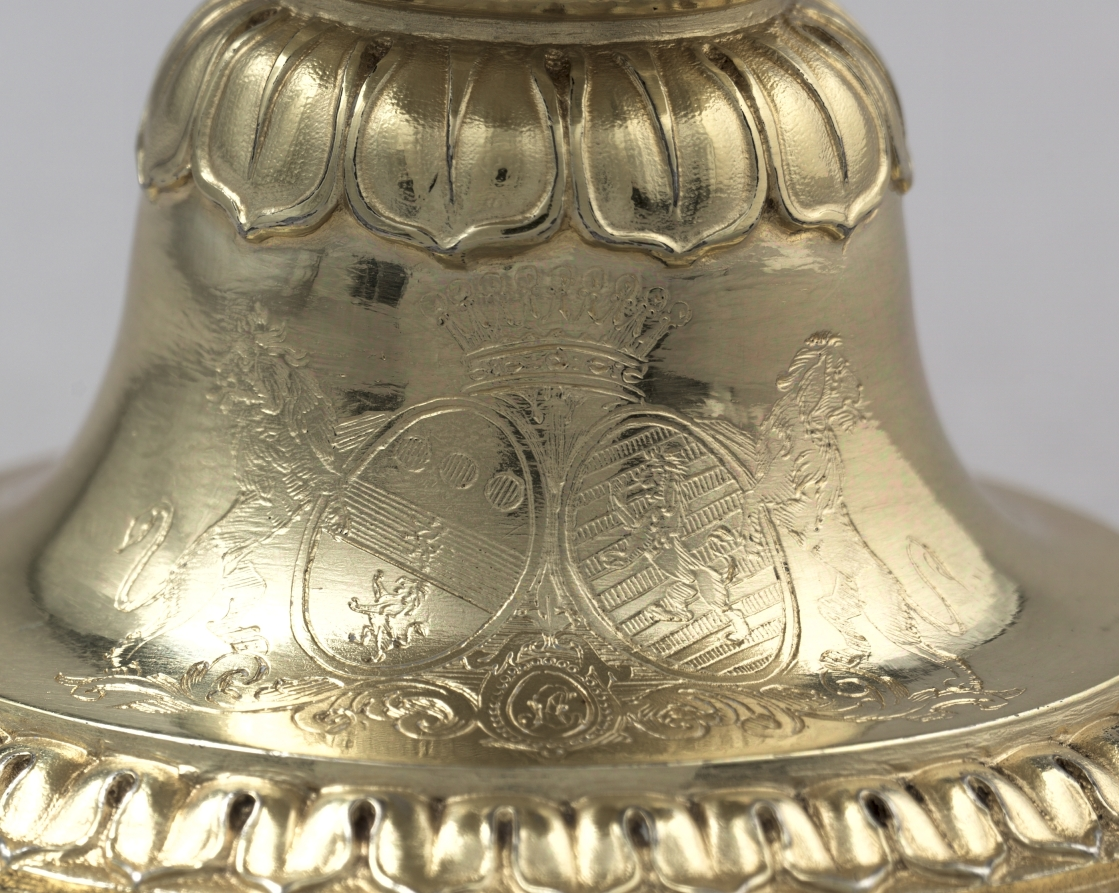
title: Ewer (aiguière)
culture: France, 19th century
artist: Jean Baptiste Claude Odiot (French)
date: c. 1817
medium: silver gilt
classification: Silver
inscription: [Excise mark for medium-sized work, Paris, 1809-1819, on edge of base]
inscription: [Two maker's marks of Jean-Baptiste-Claude Odiot after the Revolution, inside foot]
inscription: [Official assay mark for first standard silver, Paris, 1809-1819, near exterior upper rim]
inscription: [Applied coat of arms of the count Alfred de la Chapelle, Seigneur of Morton and Beaulieu, Périgord “accolé” with an alternate version of de la Chapelle, exterior of foot]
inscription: [Struck twice, interior foot]: "ODIOT"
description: Jean-Baptiste-Claude Odiot’s reputation stretched internationally. Commissioned by Russian count Nikolei Demidoff, this ewer was one part of an extensive silver dinner service. Decorated with motifs of classical antiquity, this object’s Greco-Roman silhouette, grape vine frieze, raised mythological figures, and sinuous swan’s neck handle were likely inspired by the designs of Charles Percier and Pierre-François Fontaine, architects of Napoleon I.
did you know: The coat of arms on the foot of this ewer belongs to the count Alfred de la Chapelle who owned this silver dinner service during the second half of the 19th century.